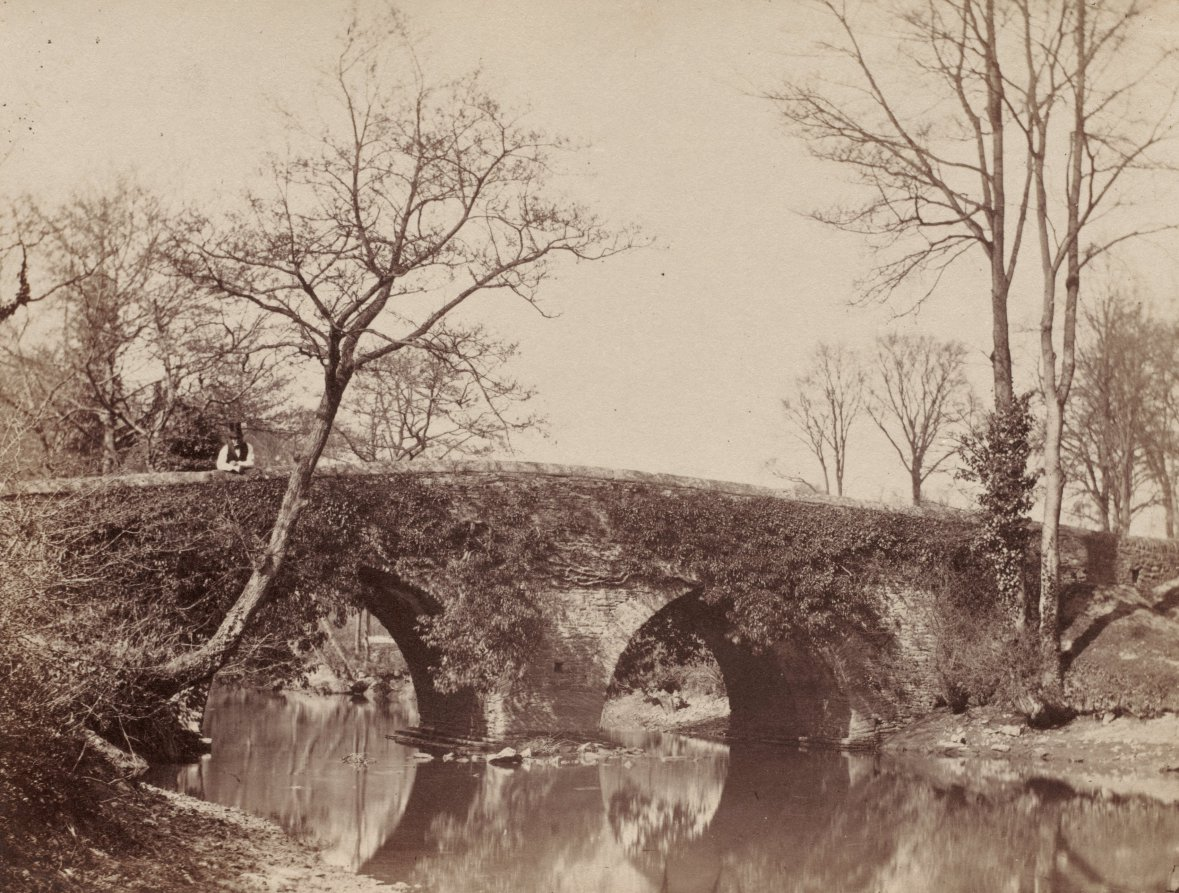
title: The Country Bridge (Staplylton Bridge, Bristol)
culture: England, 19th century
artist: John Dillwyn Llewelyn (British, 1810–1882)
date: c. 1854– 1857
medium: albumen print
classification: Photograph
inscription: written in pencil on verso of mount: "13838-4.09/The Country Bridge/John Dillwyn Llewelyn"